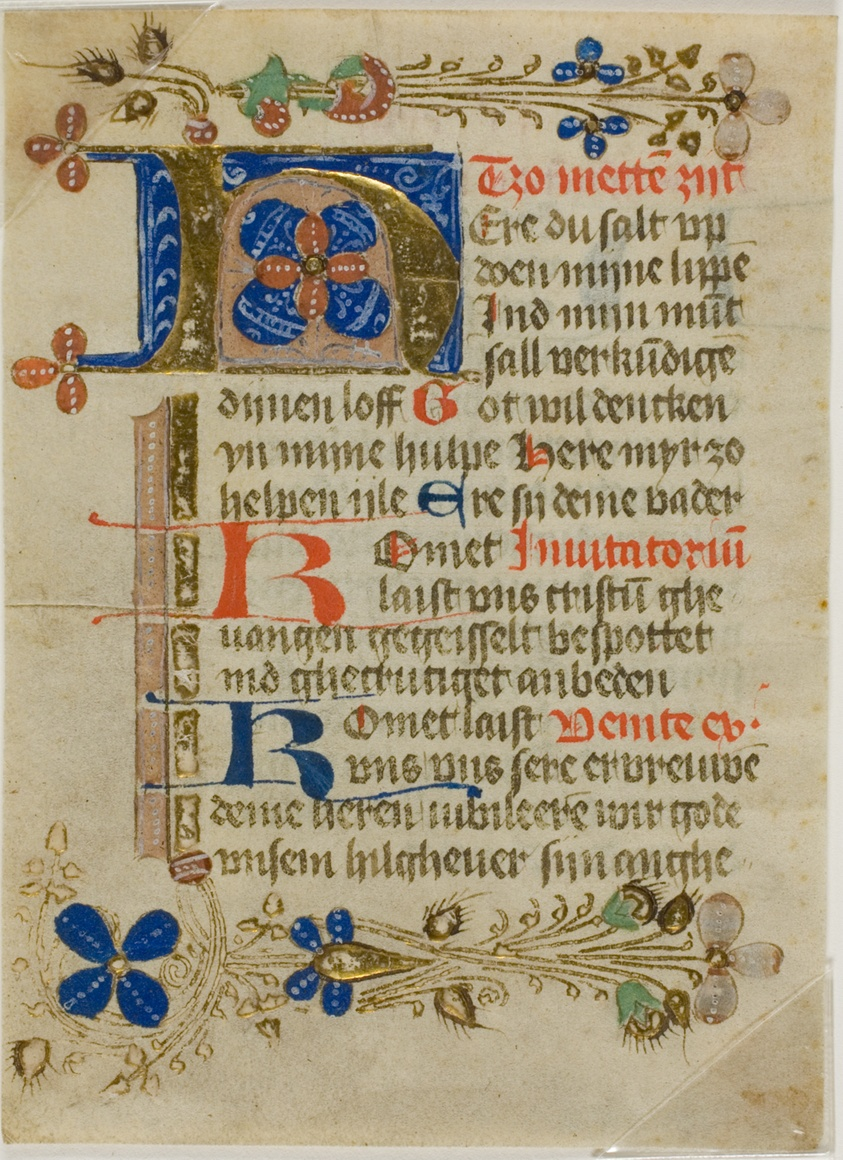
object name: Drawing and Watercolor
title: Illuminated Initial "H" from a Prayerbook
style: medieval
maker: Northern German (possibly Munster)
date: 15th century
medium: Manuscript cutting in tempera and gold leaf, with Plattdeutsch inscriptions in light brown, red and blue inks, on parchment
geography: Germany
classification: pen and ink drawings; manuscript; drawings (visual works); prints and drawing